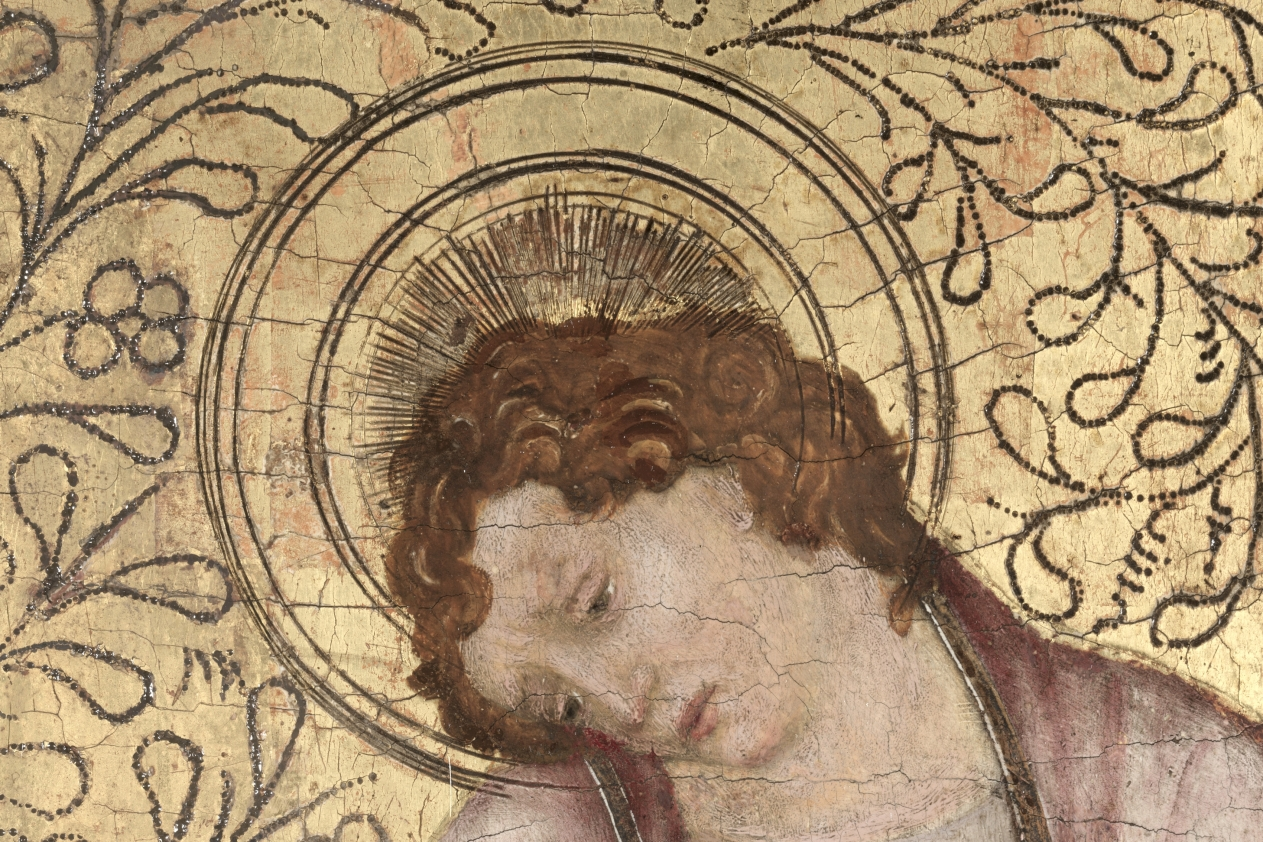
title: Calvary with a Carthusian Monk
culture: France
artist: Jean de Beaumetz (French, c. 1335–1396)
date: 1389–95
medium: oil on oak panel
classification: Painting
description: Jean de Beaumetz became the official court painter to the Burgundian duke, Philip the Bold, in 1376. Between 1389 and 1395 he created devotional paintings for the monks’ cells at the Chartreuse de Champmol, the monastery founded by Philip and his wife Margaret to house the ducal tombs. This panel, originally one of 26, is only one of two that have survived; the second is preserved in the Louvre in Paris. The Carthusians were intensely devoted to the Passion of Christ; particularly bloody images of the Crucifixion often decorated their cells. Isolated from one another, the monks contemplated the sacrifice of Christ (emphasized here by the presence of a Carthusian monk at the foot of the cross) creating an empathetic connection with the suffering of the Virgin who faints in the arms of the two Marys. Saint John the Evangelist, on the right, bows his head in sorrow. The punched decoration in the gold background represents the Trees of Life and Knowledge, emphasizing the biblical connection between Adam and Christ.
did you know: Records exist detailing the delivery of the this panel and 25 others to the monastery Chartreuse de Champmol, for use in the monks' cells.